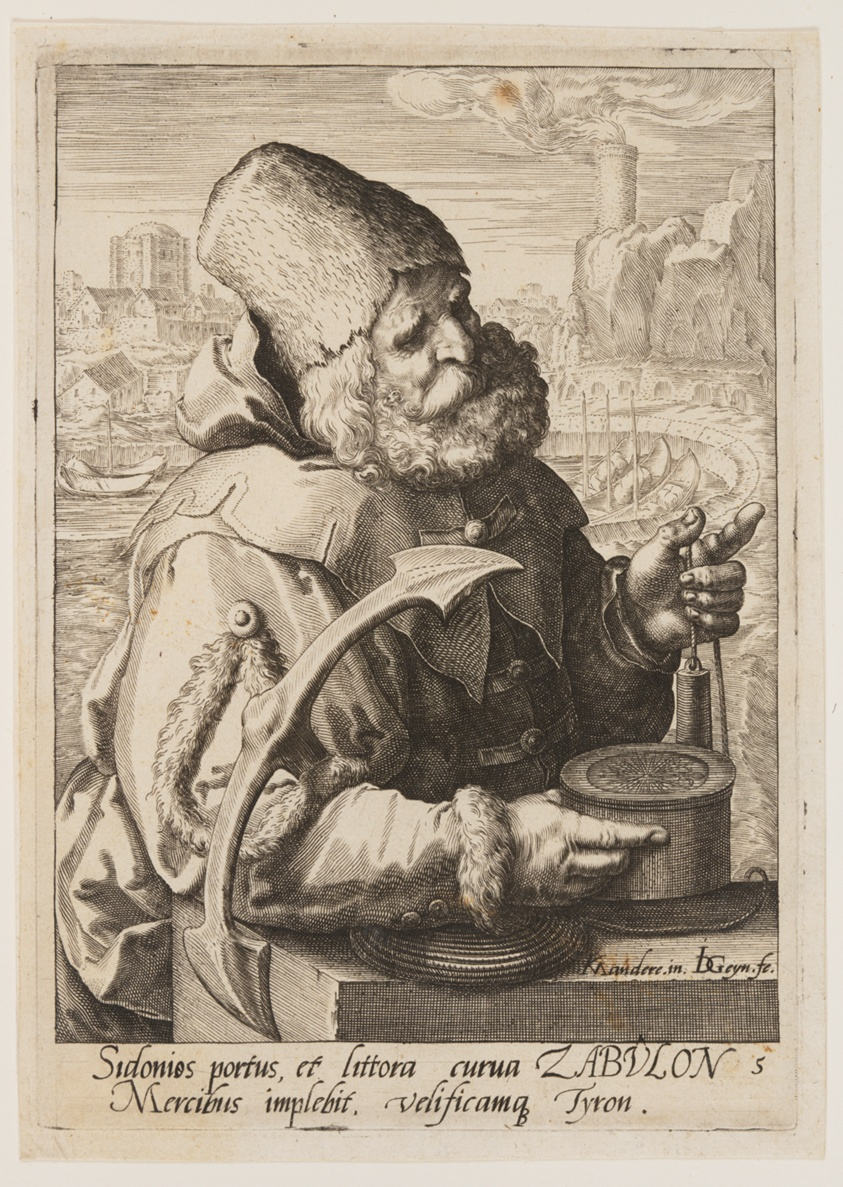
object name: Print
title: Zebulon, from The Twelve Sons of Jacob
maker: Jacques de Gheyn II (Dutch, 1565–1629); after Karel van Mander (Dutch, 1548–1606)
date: c. 1589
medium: Engraving on ivory laid paper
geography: Netherlands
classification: engraving; paper; print; prints and drawing